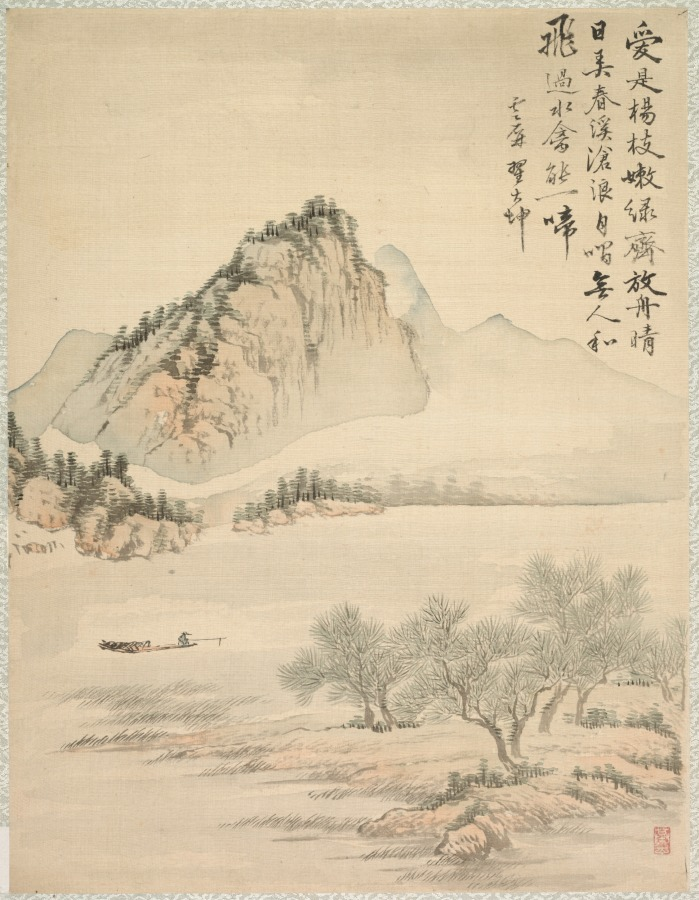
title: Drifting in a Boat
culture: Japan, Edo period (1615–1868)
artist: Tsubaki Chinzan (Japanese, 1801–1854)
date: 1847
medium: album leaf; ink and color on silk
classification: Portfolio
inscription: Tsubaki Chinzan inscribed each leaf with the same inscription that Zhai Dakun wrote on his album leaves.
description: As the title of this album suggests, Tsubaki Chinzan painted each of the landscapes included in the album after interpretations of the styles of old masters by Chinese painter Zhai Dakun (翟大坤, active 1730–1804). In addition to the painted compositions, he also copied the inscriptions on Zhai Dakun's paintings.